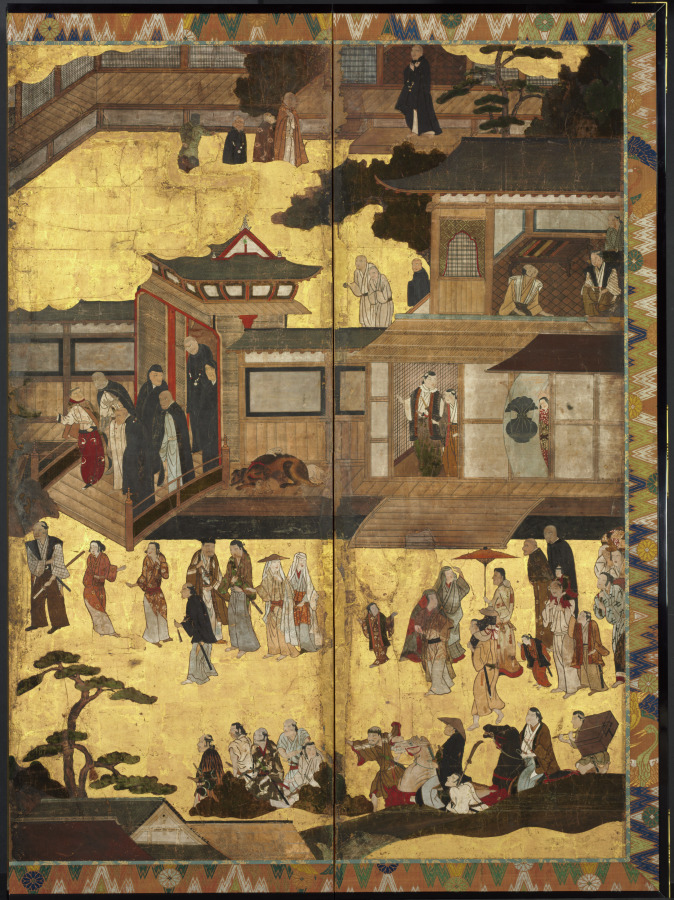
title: Arrival of the "Southern Barbarians"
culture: Japan, Momoyama period (1573–1615)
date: c. 1600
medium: One of a pair of six-panel folding screens; ink, color, and gold on paper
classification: Painting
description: This screen and its corresponding screen show Portuguese merchants arriving in Japan, having crossed the oceans in their large ship with a multinational crew. The Portuguese were known in Japan as the “Southern Barbarians” because they arrived from the south and their customs and manners were unfamiliar to the Japanese, who had not encountered anyone from Europe until their first appearance in 1543. In 1639, the Portuguese were forced out of Japan, mainly owing to internal difficulties caused by their Catholic missionaries, but they were a major conduit for both objects and ideas from Europe for nearly 100 years.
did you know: Europeans were called "Southern Barbarians" because their ships arrived in Japan from the south.